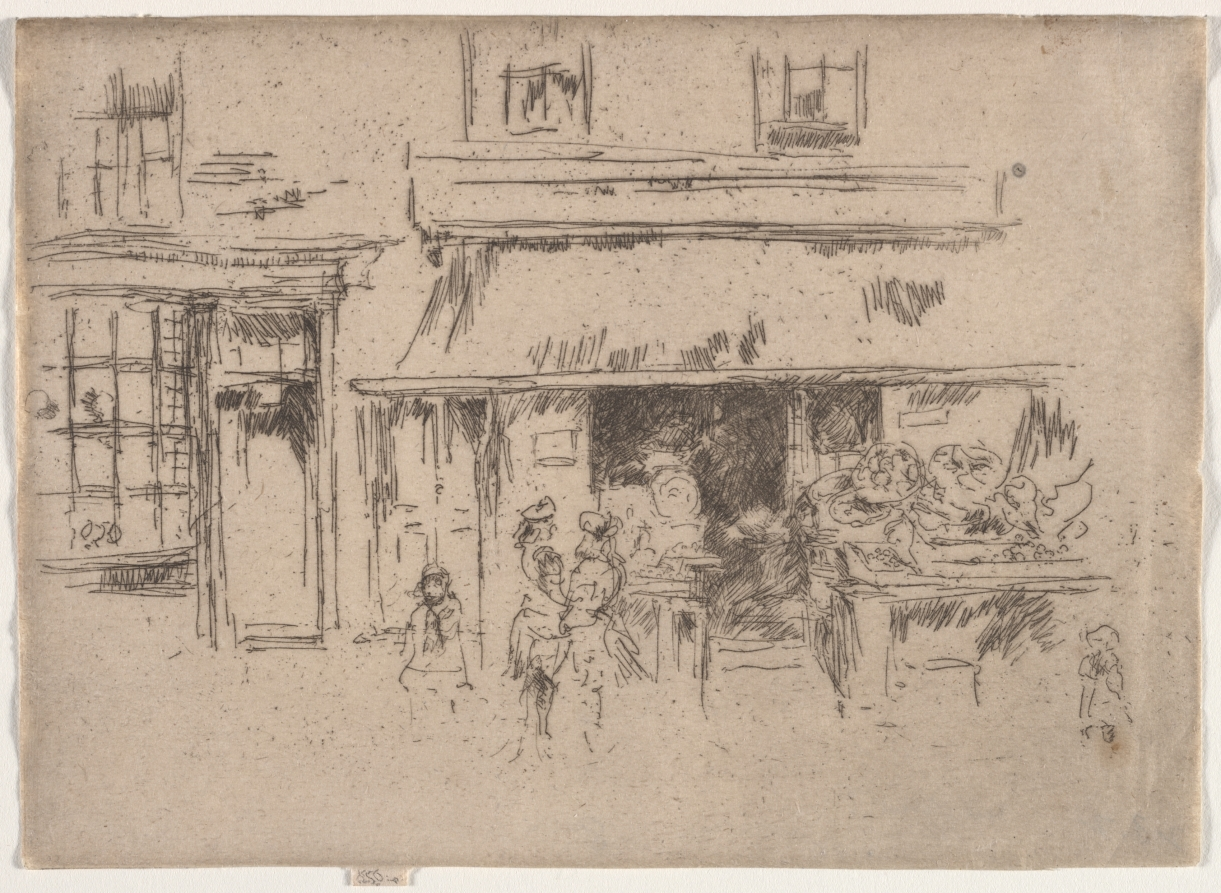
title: Exeter Street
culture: America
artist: James McNeill Whistler (American, 1834–1903)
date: 1887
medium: etching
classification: Print